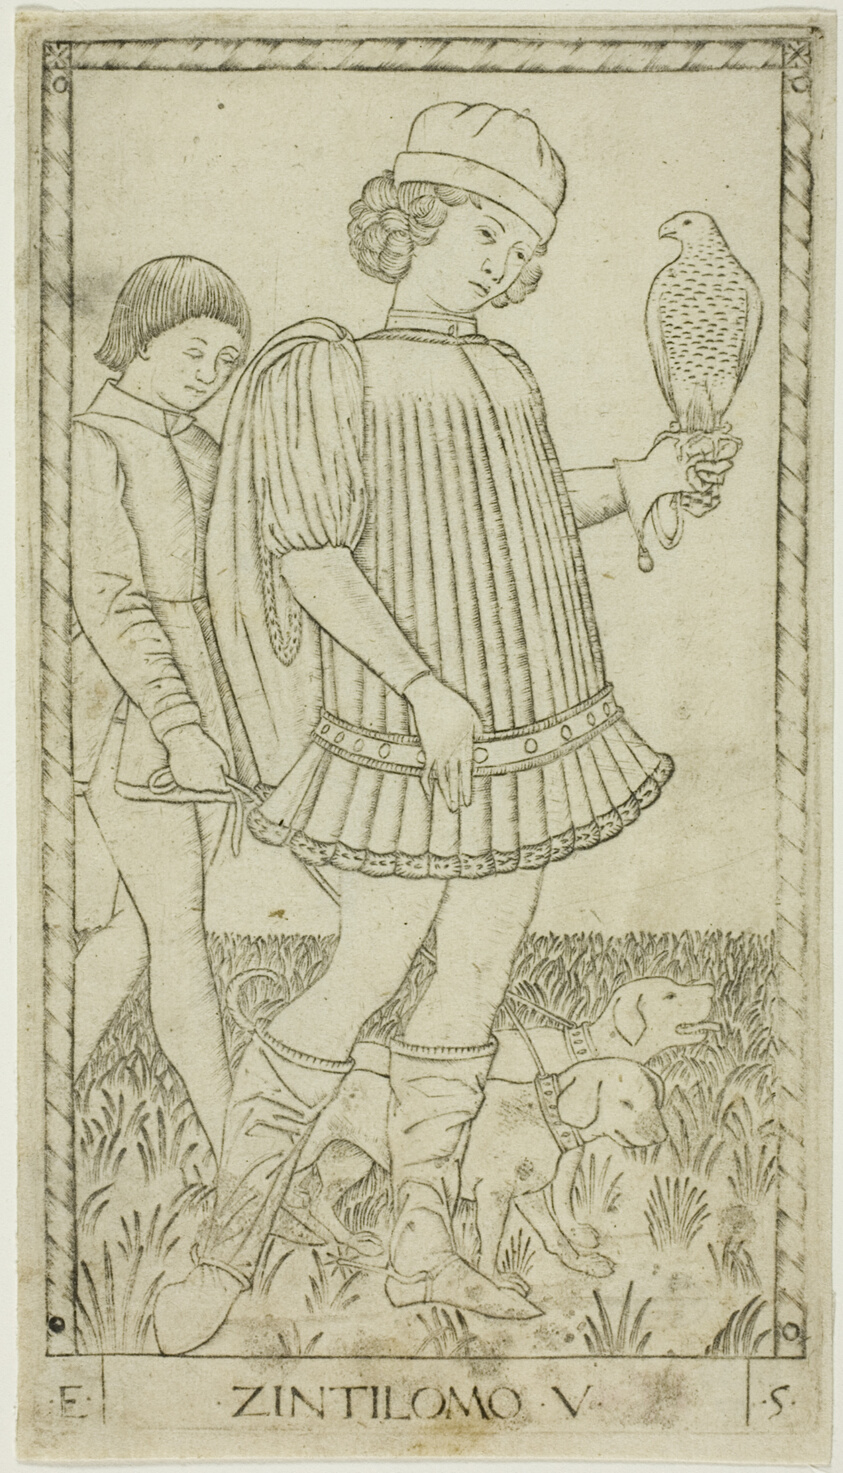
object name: Print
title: The Gentleman, plate five from The Ranks and Conditions of Men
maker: Master of the E-Series Tarocchi (Italian, active c. 1465)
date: c. 1465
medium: Engraving on ivory wove paper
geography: Italy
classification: engraving; print; prints and drawing